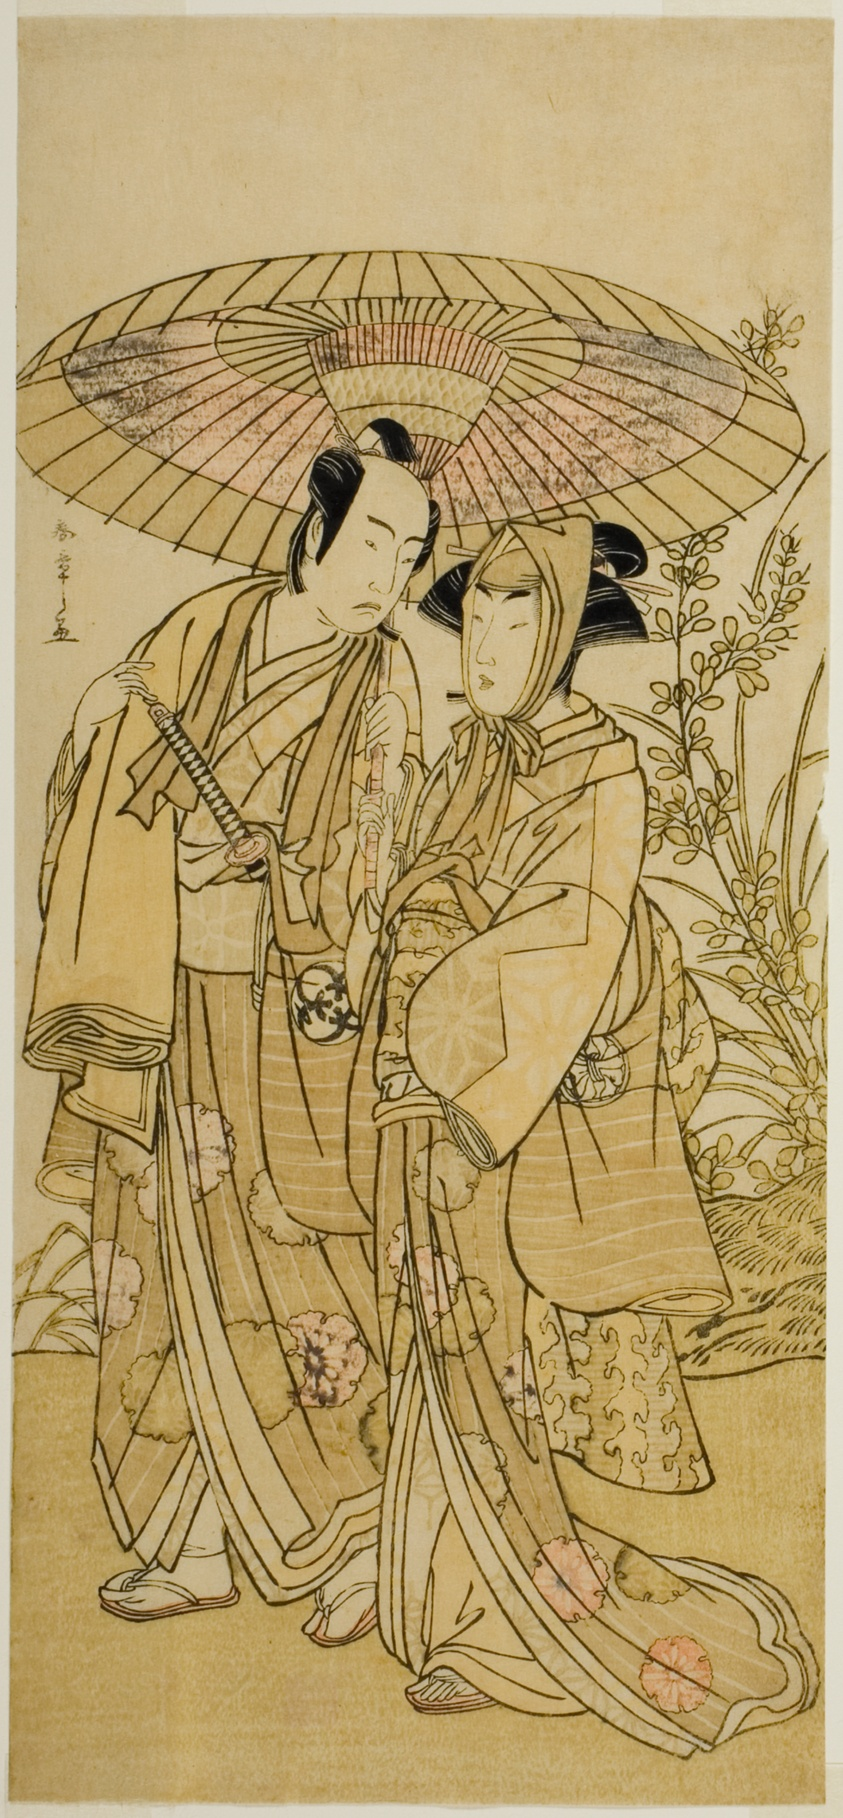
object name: Print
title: The Actors Segawa Kikunojo III (right) as Ochiyo, and Bando Mitsugoro I (left) as the Greengrocer Hambei, in the Play Kabuki no Hana Bandai Soga, Performed at the Ichimura Theater in the Fourth Month, 1781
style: Japanese (culture or style)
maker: Katsukawa Shunsho 勝川 春章; Japanese, 1726-1792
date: c. 1781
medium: Color woodblock print; hosoban; left sheet of diptych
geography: Japan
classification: woodblock print; print; asian art